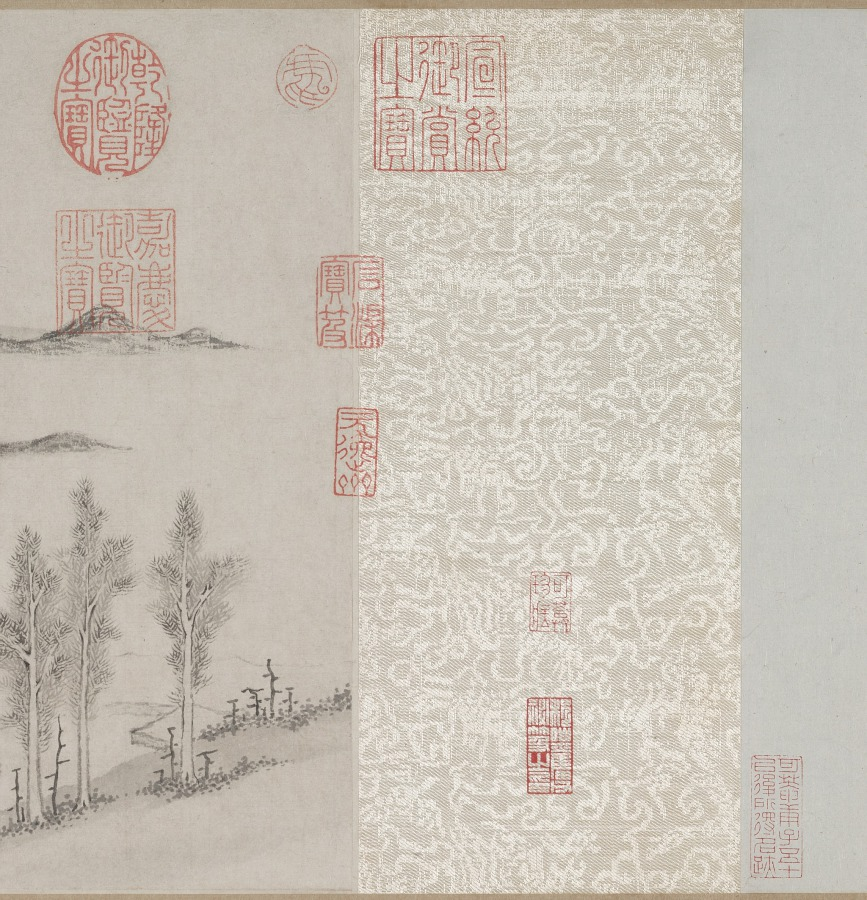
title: Water Village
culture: China, Ming dynasty (1368–1644)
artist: Wen Boren (Chinese, 1502–1575)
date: 1570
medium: handscroll; ink and light color on paper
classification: Painting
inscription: 隆慶庚午秋仿趙文敏筆. 五峰文伯仁 [印] 五峰山人; 文伯仁印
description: In the autumn of 1570, Wen Boren painted this seemingly unemotional scene of low-lying marshlands with a chain of rounded mountains in the background. A fishing boat is nestled on the shore near the village. Although paths and bridges traverse the landscape, only two people are visible in the stillness. From the restrained atmosphere of this landscape, one would never guess that Wen Boren was known as the “bad boy” of the Wu School for his explosive temper. As a younger man, he was even embroiled in a contentious lawsuit with his own uncle, Wen Zhengming (1470–1559), a master of Ming dynasty painting with whom he had trained. The ideal of the scholar-painter, or literati, was that an artist’s moral character is reflected in his paintings, so there was great incongruity between Wen Boren’s difficult personality and his restrained landscapes. A contemporary, Wang Shizhen, wrote this about him: "This gentleman is prone to behave odiously and screamed accusations at people. How is it possible for him to carry in his bosom such a wealth of scenic wonders?" Who knows what effort it took to subdue his fractious spirit to project an image of coolness and refined taste in his paintings?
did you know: A foreground tree has an eccentric twisting silhouette and pepper-dot "halo" of leaves.